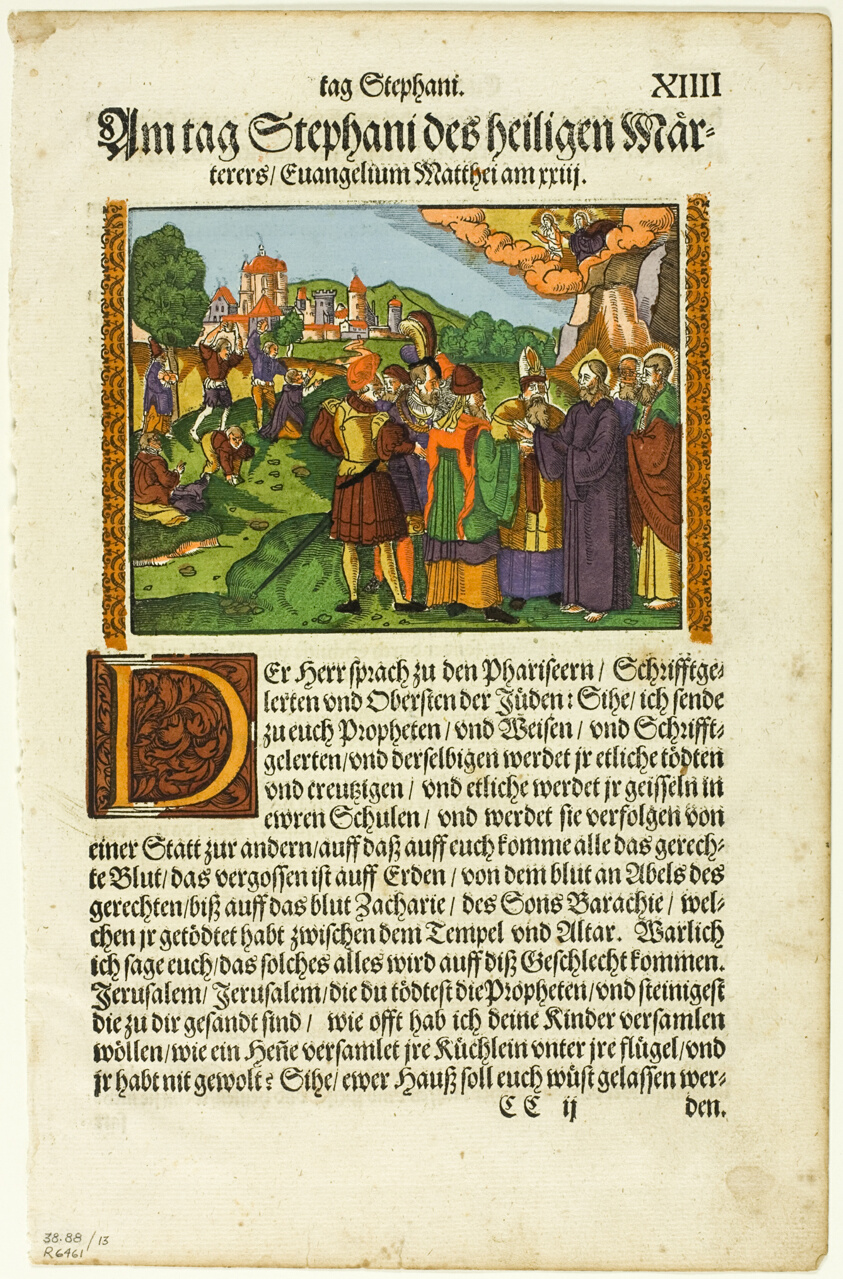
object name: Print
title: New Testament Scene, plate thirteen from Woodcuts from Books of the XVI Century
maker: Attributed to Monogrammist S.G. (German, active 1550-1570); assembled by Max Geisberg (Swiss, 1875-1943)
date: 1582, assembled into portfolio 1937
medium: Woodcut in black ink with brush and opaque watercolor and stenciling on cream laid paper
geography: Germany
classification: woodcut; print; prints and drawing